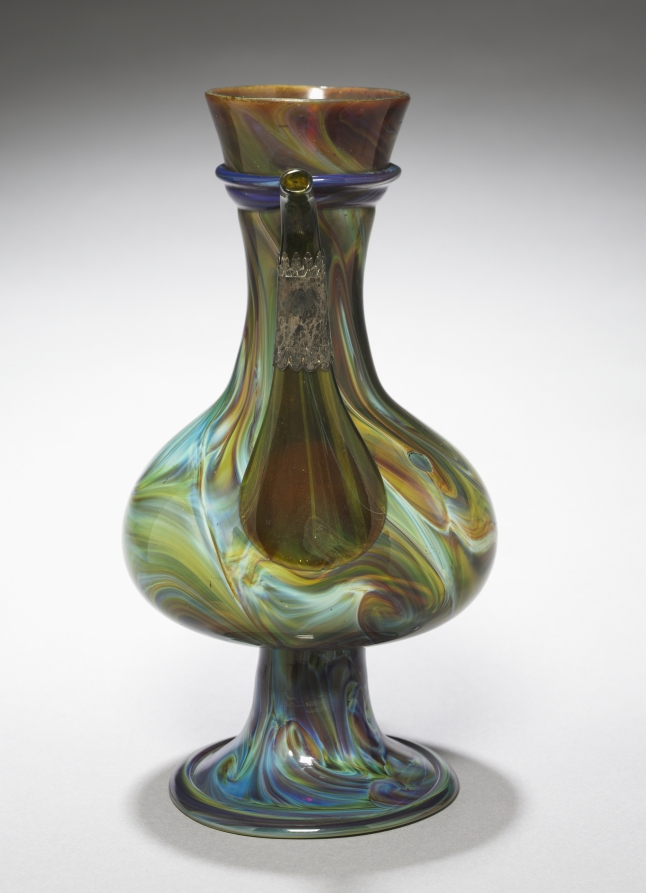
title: Ewer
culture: Italy, Venice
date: c. 1500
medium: "Chalcedony" inlaid glass; silver mount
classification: Glass